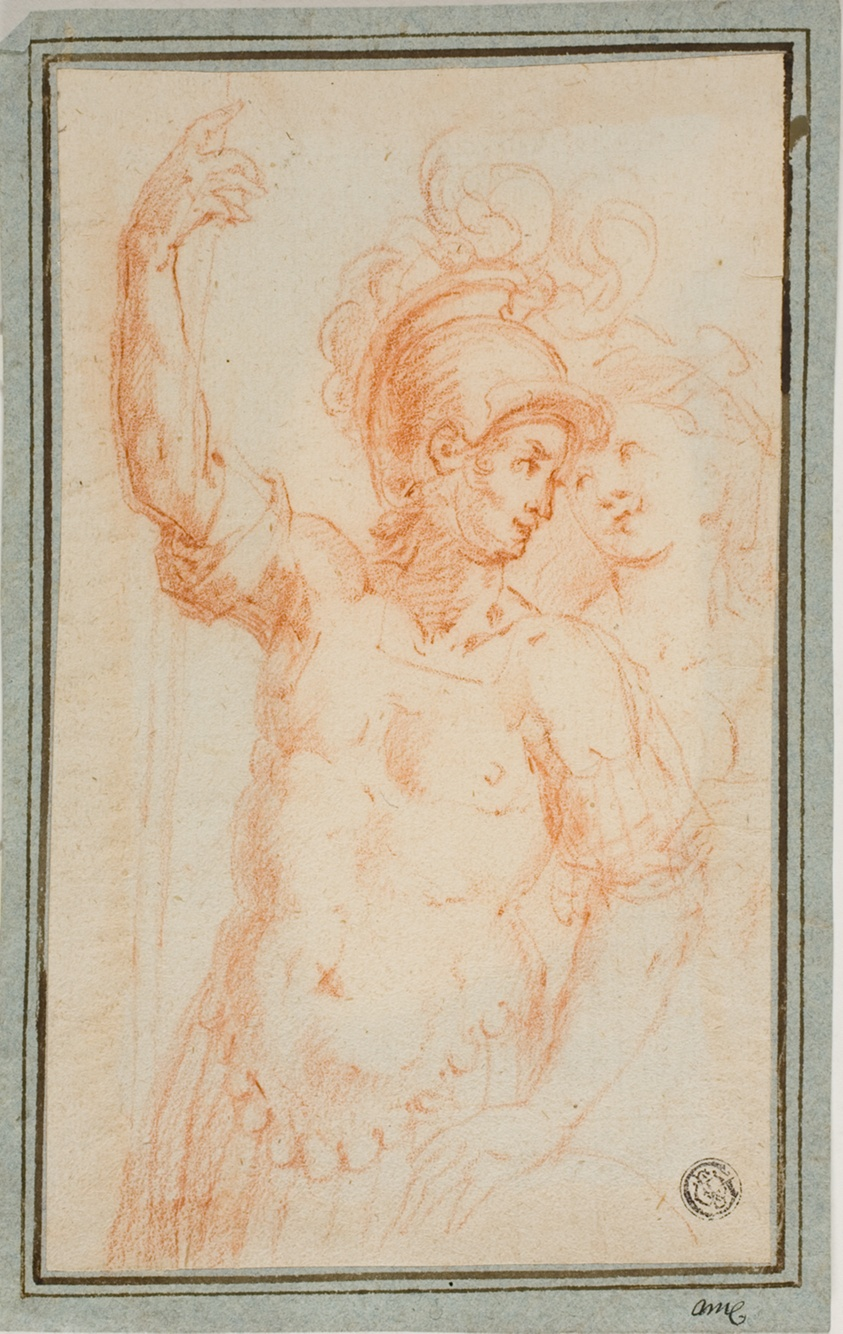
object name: Drawing and Watercolor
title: Roman Soldier and Woman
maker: Attributed to Ercole Procaccini, the younger (Italian, 1596-1676); or Bernardino Poccetti (Italian, 1548-1612)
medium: Red chalk on ivory laid paper, tipped onto blue laid paper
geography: Italy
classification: chalk; drawings (visual works); prints and drawing